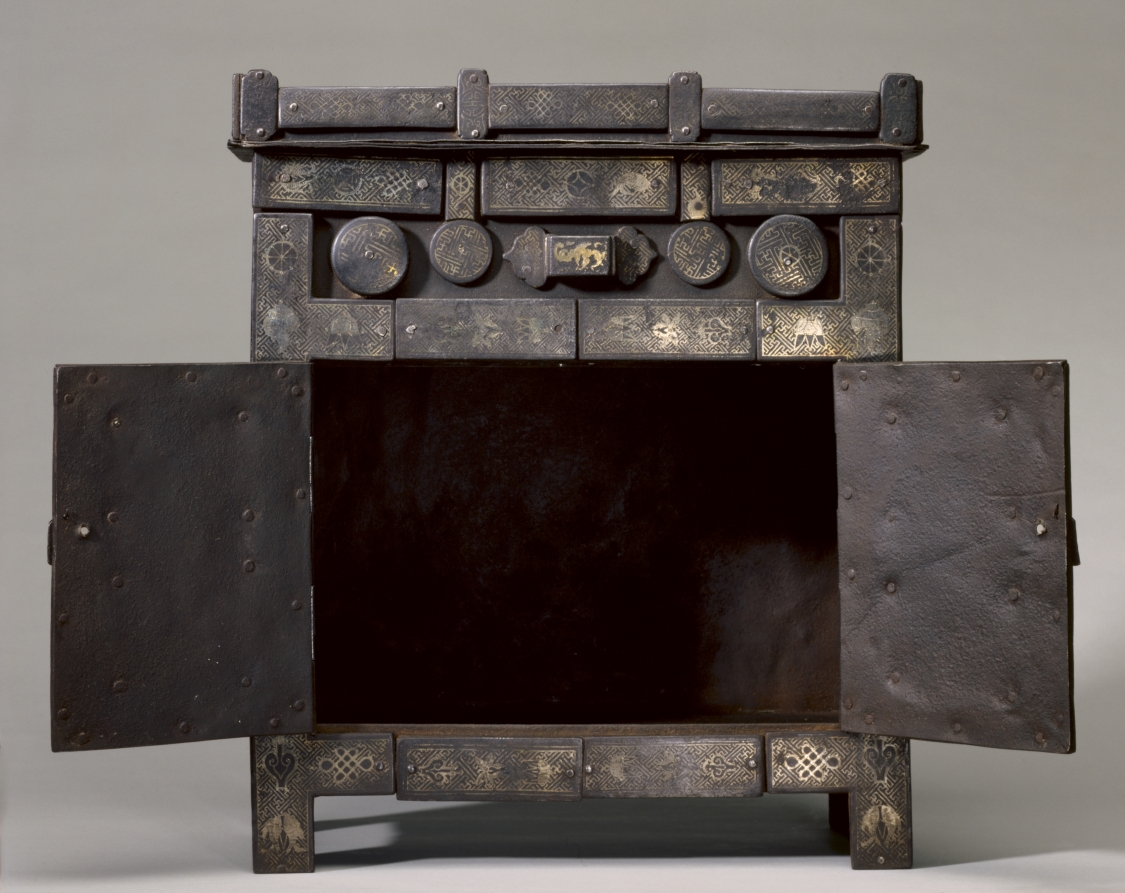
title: Spirit House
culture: Korea, Joseon dynasty (1392–1910)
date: late 1800s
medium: iron inlaid with silver and copper decoration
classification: Metalwork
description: Many homes in premodern Korean society had a memorial shrine for preparing and holding ancestral rites. Placed on the top of a tall chair, this miniature edifice (called the spirit house) served as a temporary residence for visiting ancestral spirits. On the table, a variety of delicacies such as fruits, rice, meat, and wine would be placed to treat those spiritual guests.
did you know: The belief in two types of souls, the spiritual and the corporeal, embodied the core concept of ancestor worship in traditional China and Korea. While the corporeal soul is believed to reside in the tomb, the spiritual soul, in the spirit house, like this example, guards his or her decedents.